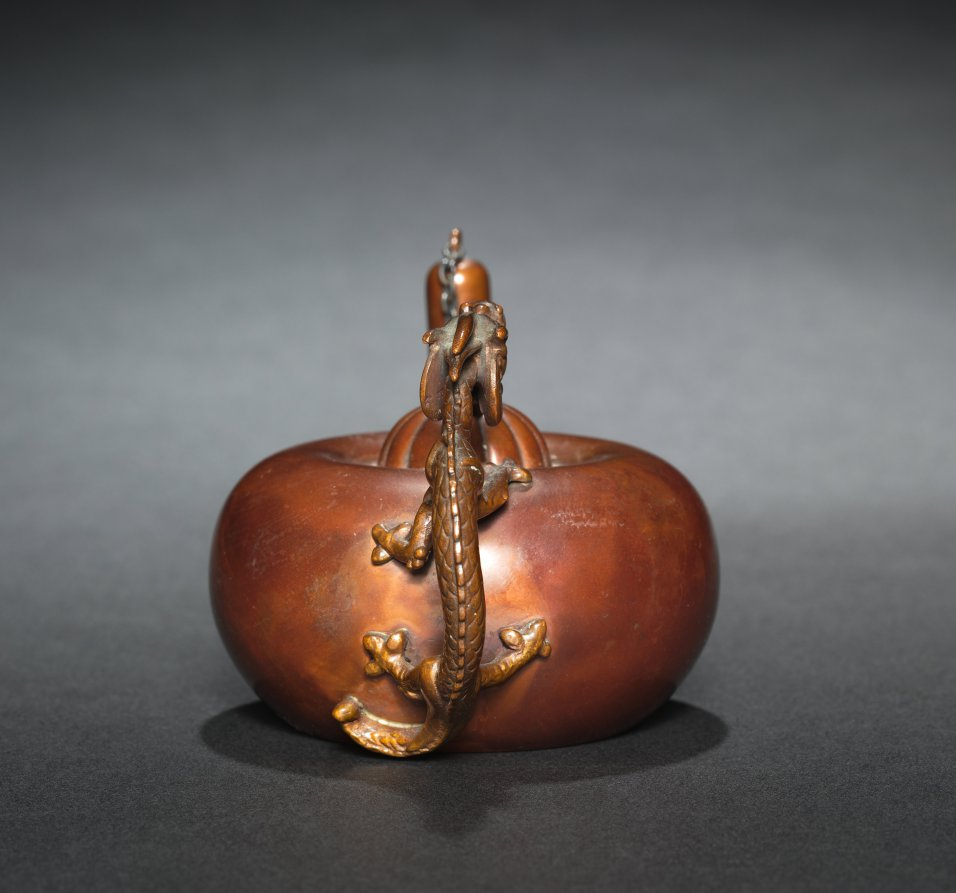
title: Oil Lamp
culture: America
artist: Gorham Manufacturing Company (America, est. 1831)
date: 1880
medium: copper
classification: Metalwork